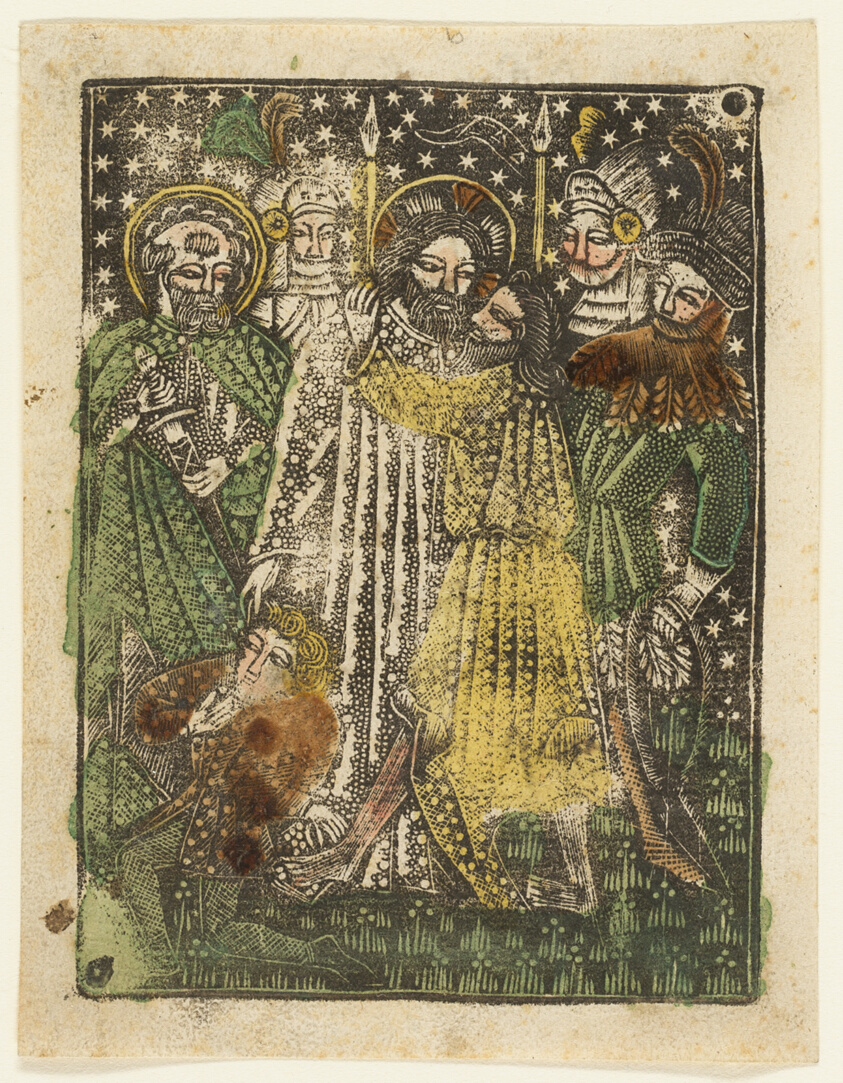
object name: Print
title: The Capture of Christ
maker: Artist unknown; Bavarian, 15th century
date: 1460–65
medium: Metalcut in black hand colored with brush and watercolor in yellow, red-brown lake, and green, on ivory laid paper, with manuscript text in pen and brown ink on verso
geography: Germany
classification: dotted/metal cut; book; prints and drawing; print